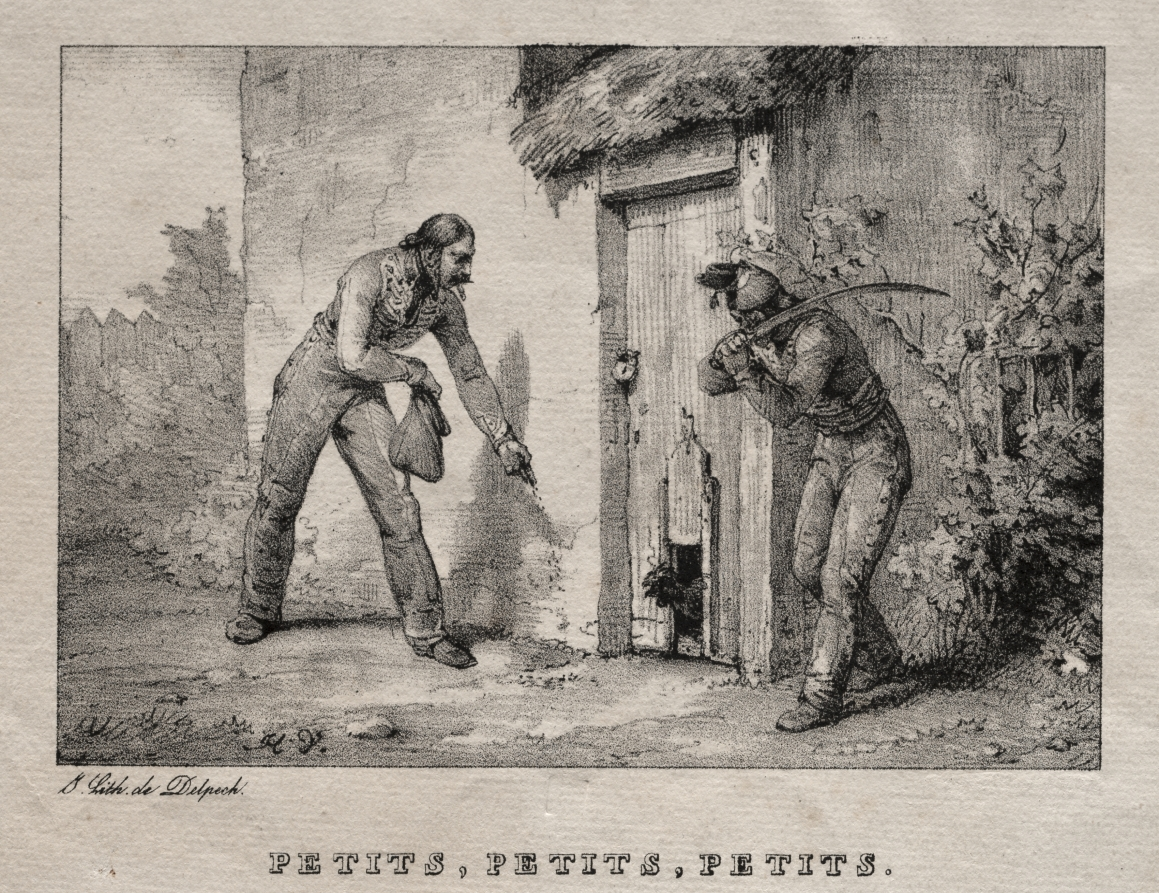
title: Marauders (Maraudeurs. Petits! Petits! Petits!)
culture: France, 19th century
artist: Horace Vernet (French, 1789–1863)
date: early 1800s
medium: lithograph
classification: Print